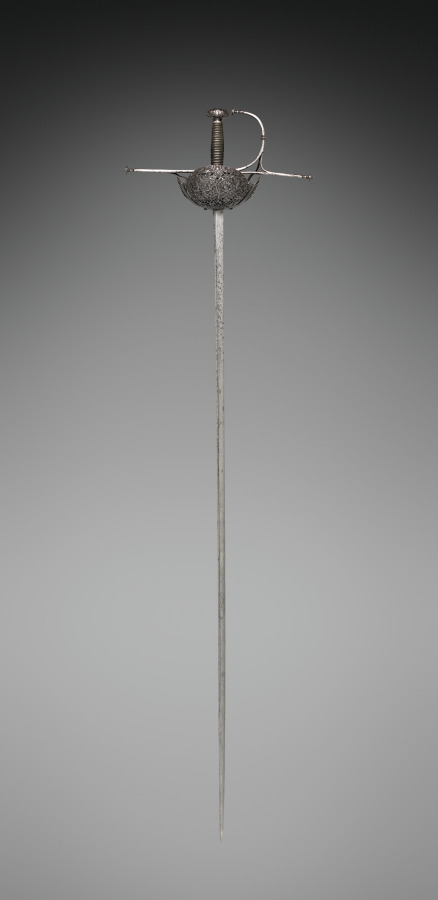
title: Rapier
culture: Spain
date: c. 1650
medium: steel, pierced and chiseled, leather and wood grip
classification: Arms and Armor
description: The rapier was a sword worn with civilian dress and used in duels. The term rapier derives from a 16th-century French word rapière, which in turn derived from the Spanish espada ropera, or “dress sword.” The rapier was a light weapon with a straight double-edged and pointed blade that, with the development of the art of fencing in the 1500s and 1600s, gradually became narrower and lighter, and thus suitable for thrusts only. With the new technique of swordplay emphasizing the point of the blade, sword guards became more complex to protect the duelist’s unarmored hand. These elaborate guards were frequently decorated by various techniques—chiseling, bluing, russeting, and damascening.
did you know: Many civilians wore swords for self defense and for settling disputes by dueling; the swords often reflected contemporary taste and fashion.